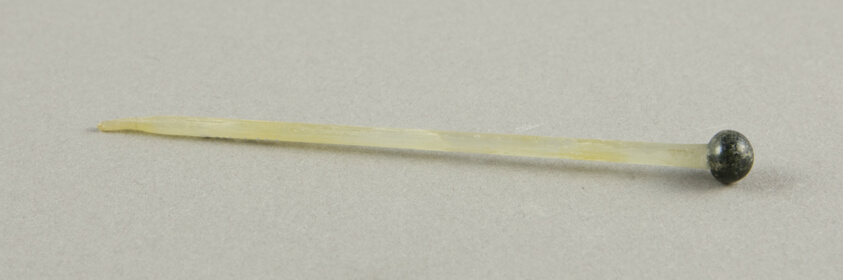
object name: Costume and Accessories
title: Cosmetic Applicator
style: ancient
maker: Ancient Mediterranean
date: 4th-6th century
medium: Glass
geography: Mediterranean Region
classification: glass; ancient art; costume